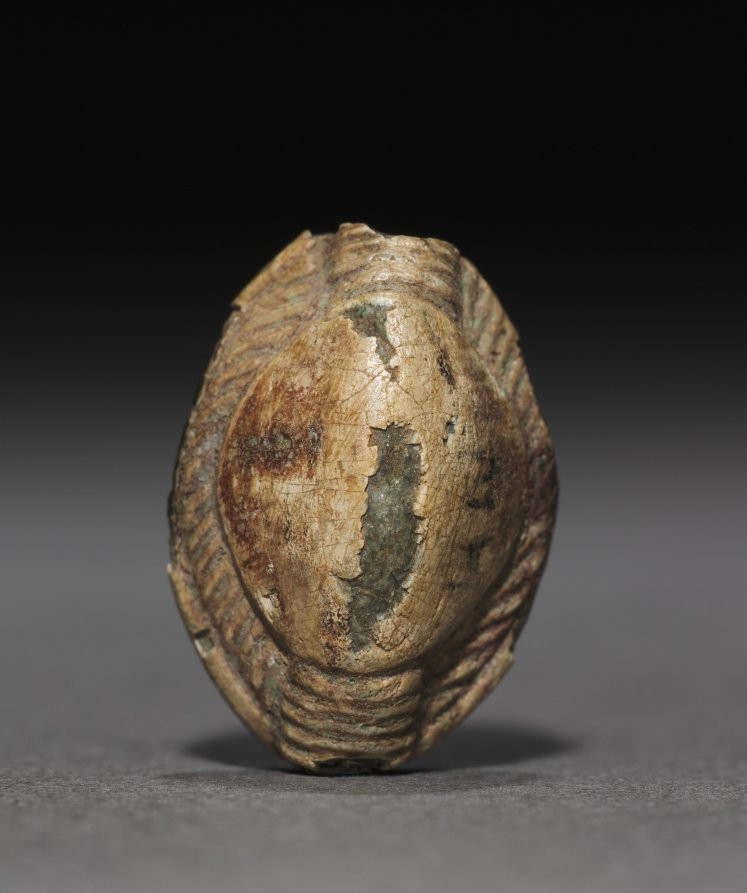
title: Cowroid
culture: Egypt, New Kingdom (1540–1069 BCE), Dynasty 18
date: 1450–1350 BCE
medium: glazed steatite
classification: Scarabs